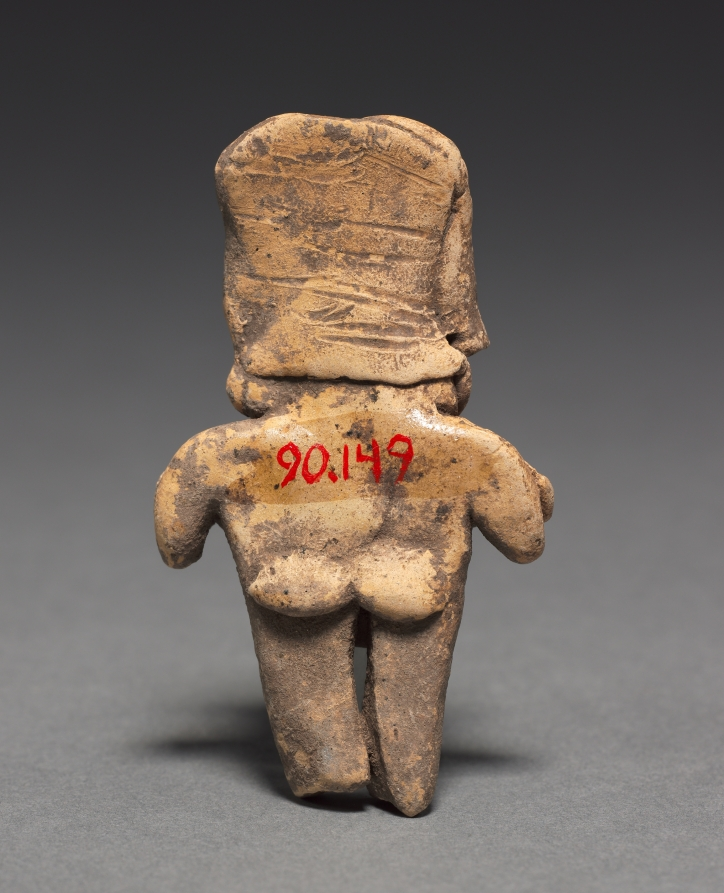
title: Female Figurine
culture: Mesoamerica, Mexico, Guanajuato, Chupícuaro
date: 400–100 BCE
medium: pottery with white and red pigment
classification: Sculpture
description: The Chupícuaro culture, located north of Mexico City in the state of Guanajuato, created a distinctive ceramic tradition including small clay figurines. This example is said to belong to a group of ten figurines from the same burial or cache (1990.145–154). The group includes both males and females that can be sorted into couples based on size.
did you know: Groups of figurines were sometimes arranged in scenes and likely used in household rituals.